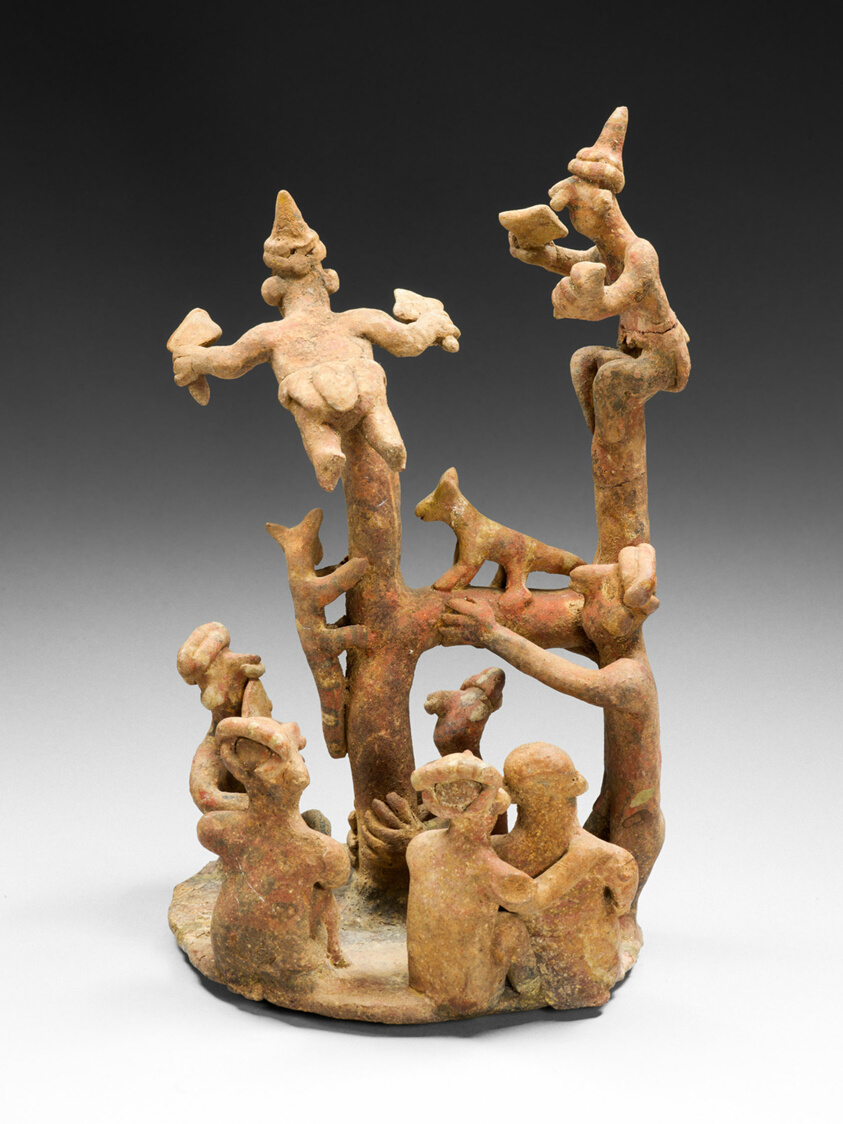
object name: Model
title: Model of a Tree-Climbing Ritual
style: nayarit, mesoamerican, Pre-Columbian, americas, west mexico, ixtalan del rio, Arts of the Americas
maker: Nayarit (Ixtlán del Río, Nayarit, Mexico)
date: 100–800 CE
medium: Ceramic and pigment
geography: Nayarit state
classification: ceramics; earthenware; art of the americas; sculpture; model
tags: people, celebrations, ritual, acrobats, performance